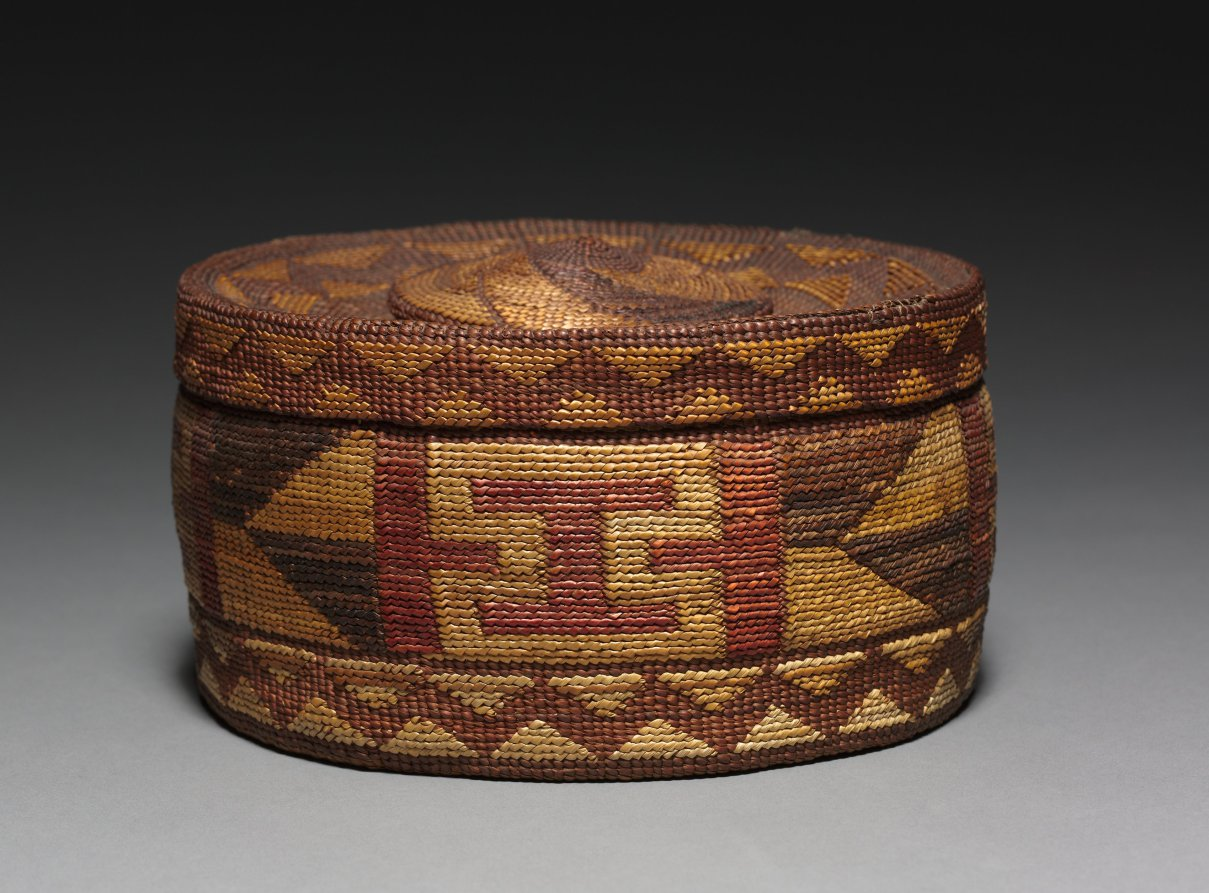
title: Basket with Rattle Top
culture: Northwest Coast, Tlingit, 20th century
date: before 1929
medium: twined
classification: Basketry